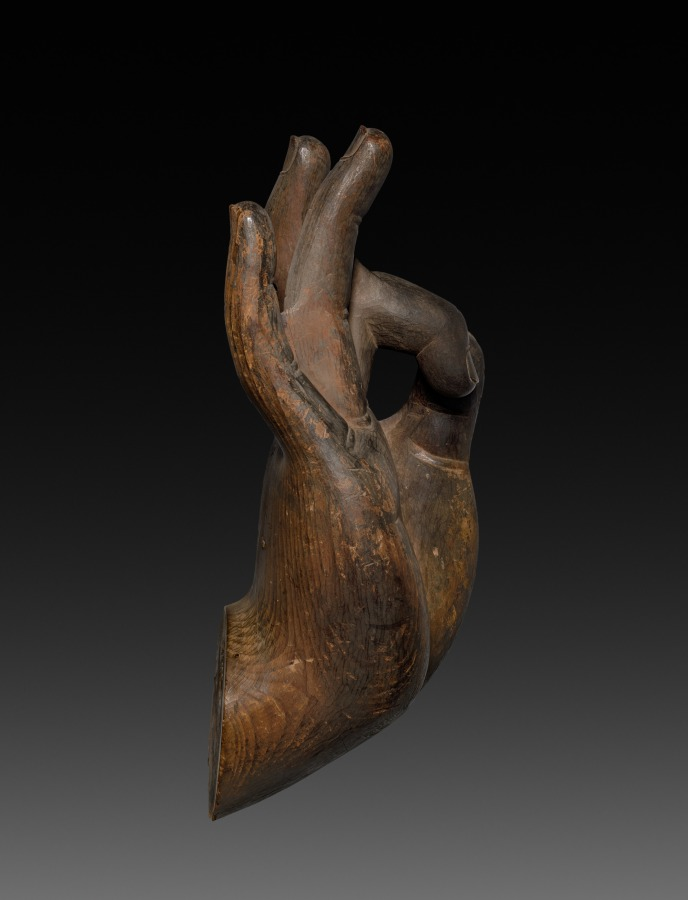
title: Hand of Buddha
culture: Japan, Nara period (710–94)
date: late 700s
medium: wood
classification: Sculpture